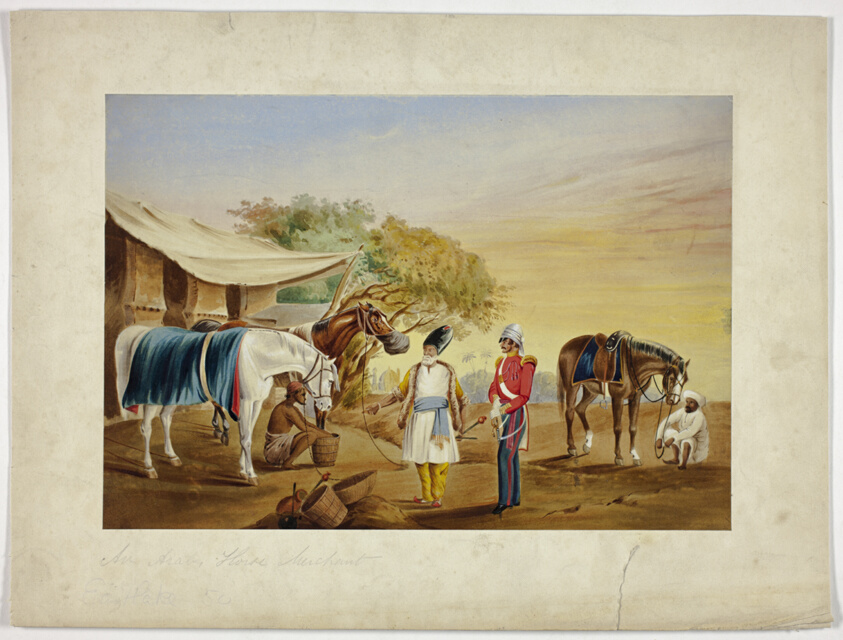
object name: Drawing and Watercolor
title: An Arab Horse Merchant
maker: Unknown Artist (British, 19th century); or possibly Charles Lock Eastlake (English, 1836-1906)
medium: Watercolor on wove paper, laid down on ivory wove paper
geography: England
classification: watercolor; drawings (visual works); prints and drawing